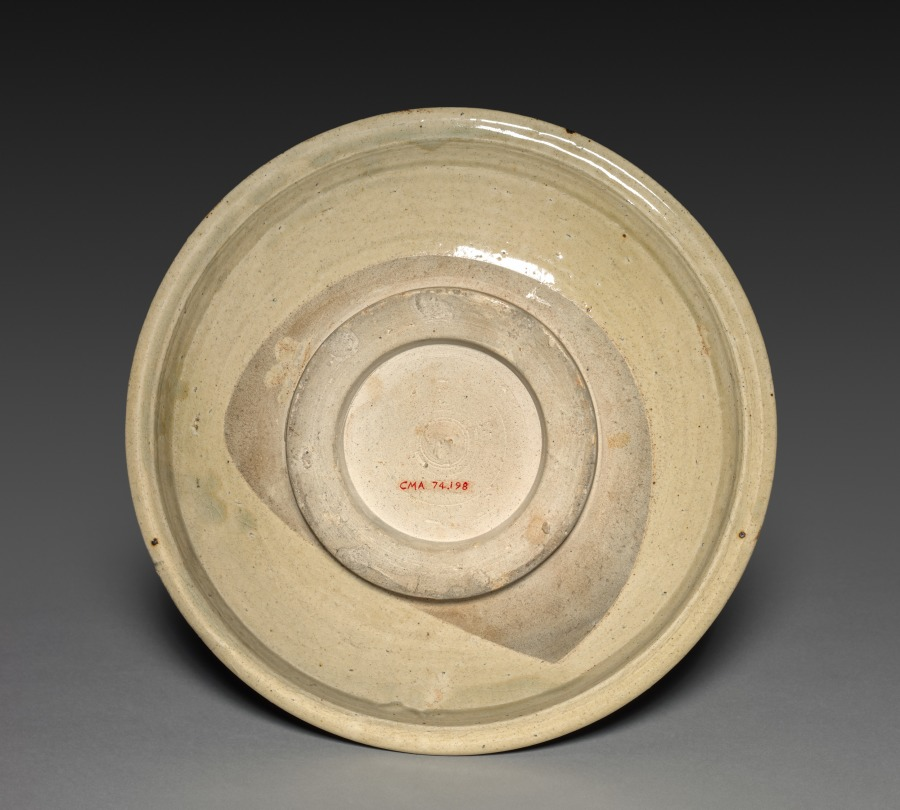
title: Plate: Seto Ware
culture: Japan, Edo period (1615–1868)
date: 1700s to mid-1800s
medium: glazed stoneware (Seto ware)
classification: Ceramic